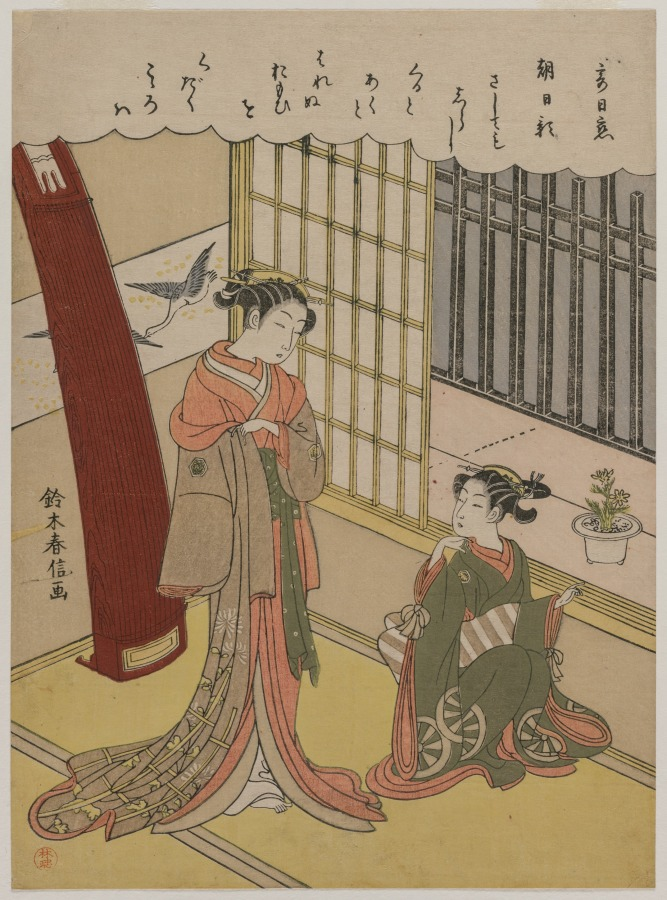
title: Woman and Maid Servant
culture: Japan, Edo period (1615–1868)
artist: Suzuki Harunobu (Japanese, 1724–1770)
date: late 1760s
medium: color woodblock print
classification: Print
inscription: Signature: Suzuki Harunobu ga